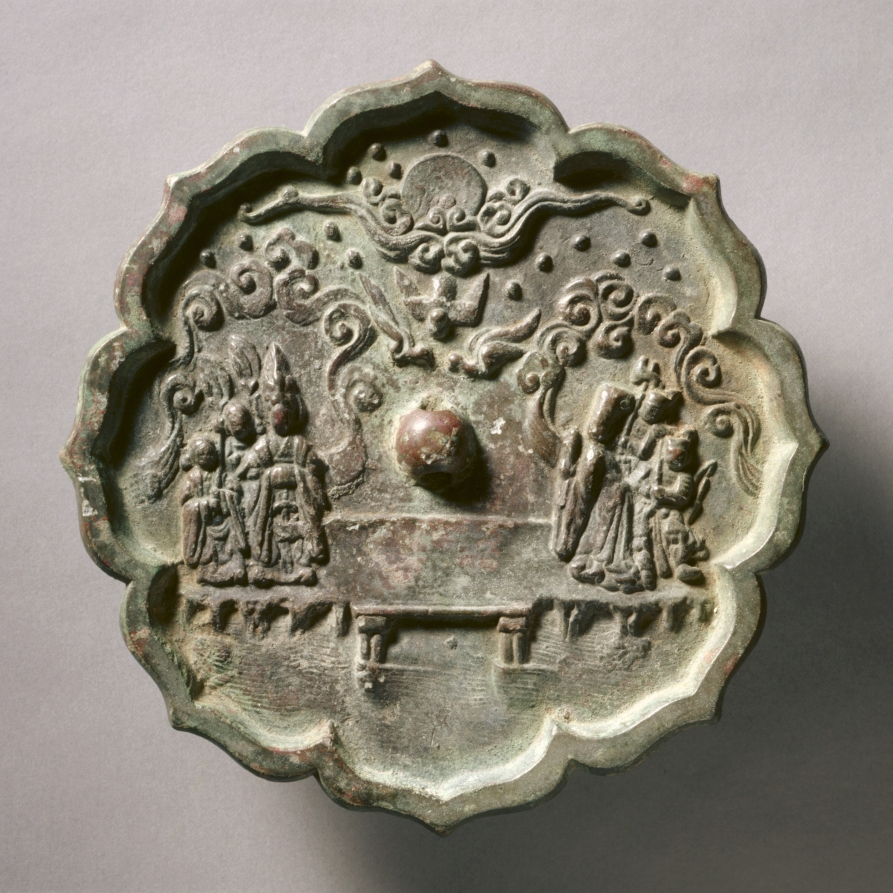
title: Octafoil Mirror with Legend of Herdboy and Weaver Maid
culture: China, Song dynasty (960-1279)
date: mid-900s-late 1200s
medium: bronze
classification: Metalwork